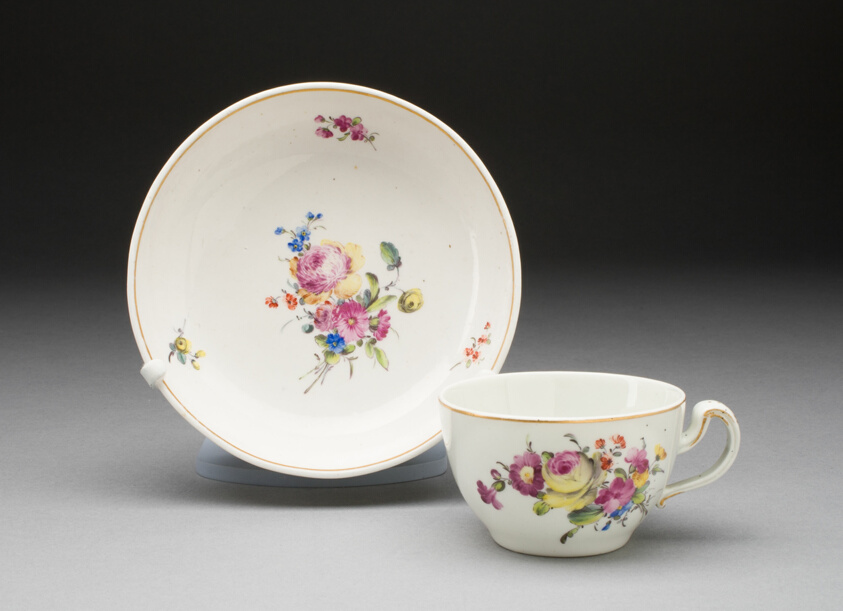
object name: Ceramics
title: Cup and Saucer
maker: Netherlands, The Hague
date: 1778/86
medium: Porcelain, polychrome enamels, and gilding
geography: The Hague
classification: drinking vessel; porcelain; european decorative arts; ceramics